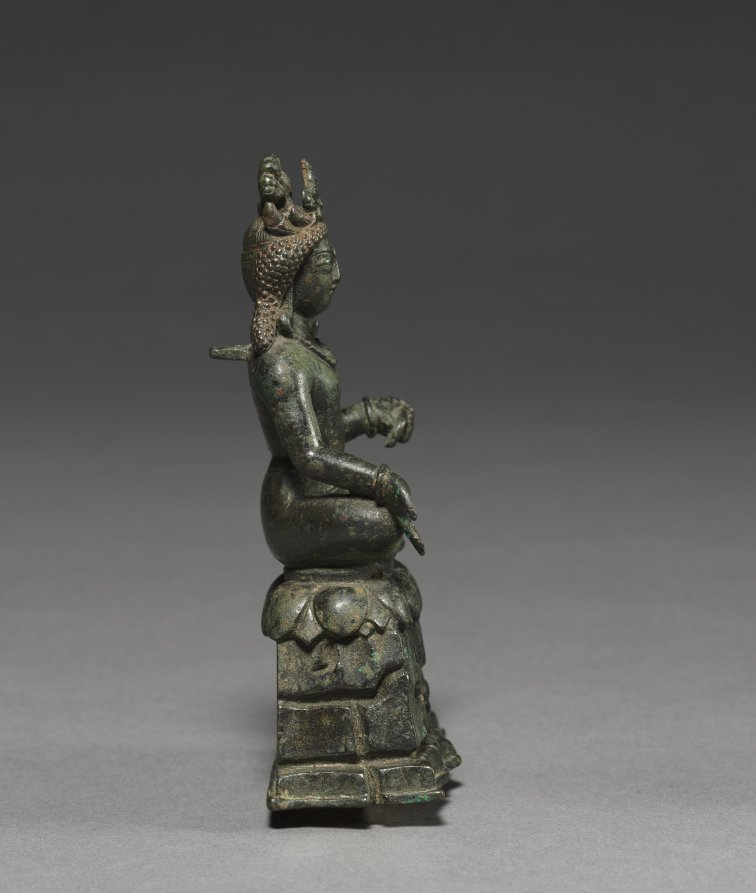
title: Padmapani Lokeshvara Seated on the Rock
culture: India, Kashmir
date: 700s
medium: bronze with silver overlay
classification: Sculpture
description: Though diminutive, this image conveys a monumental power through the intense expression particular to Kashmiri art. He sits alert in yogic concentration on a lotus pedestal that exists miraculously in a rocky wilderness. His left hand holds the stem of a lotus flower—the main attribute of this bodhisattva of compassion. His generously sized right hand with fleshy palm is in the gift-giving gesture. The tiny figure of Amitabha, the Buddha who sits in meditation in his crown, identifies the image as Avalokiteshvara.